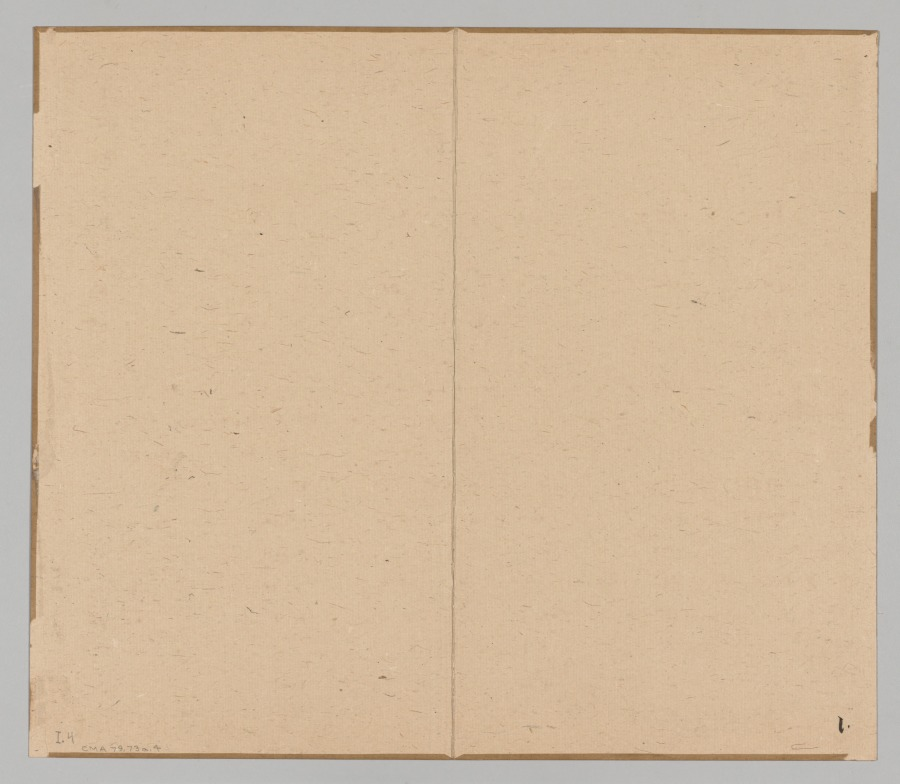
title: Reverberations of Taiga, Volume 1 (leaf 4)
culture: Japan, Edo period (1615–1868)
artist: Aoki Shukuya (Japanese, d. 1802)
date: mid- to late 1700s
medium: double-leaf from a pair of albums; ink and light color on paper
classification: Portfolio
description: Traditionally, young painters in Japan began their studies with an established master-painter. The master's compositions invariably became models that the apprentice copied to learn various ink and brush techniques. Shukuya was a pupil of the famous Kyoto artist Ikeno Taiga, whose style is reflected in these sketches of rocks, trees, and mountains.